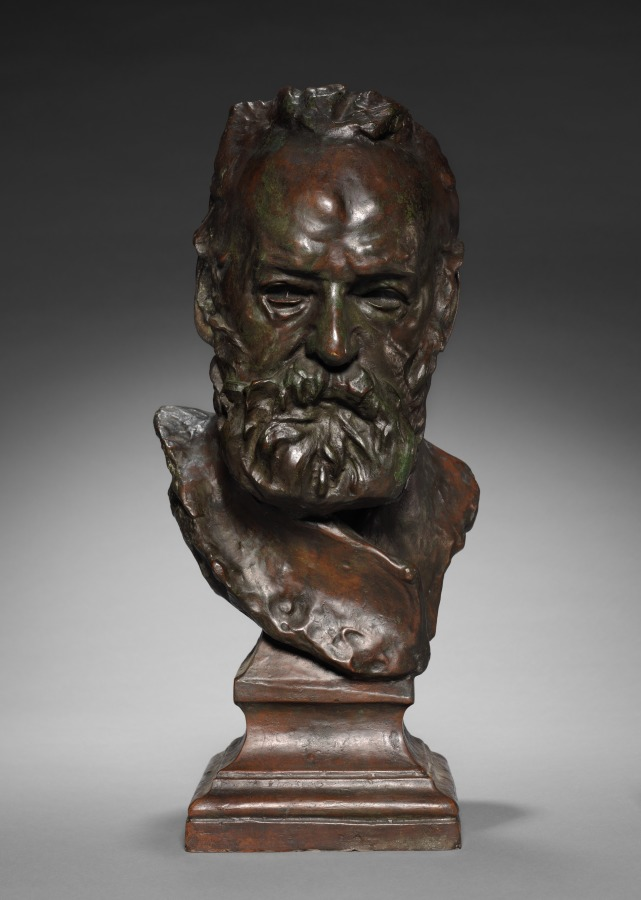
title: Bust of Victor Hugo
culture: France, 19th century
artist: Auguste Rodin (French, 1840–1917)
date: 1883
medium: bronze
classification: Sculpture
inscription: Signed beneath fold of drapery to left: "A. Rodin"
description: Unlike most of Rodin’s portraits, the bust of Victor Hugo (1802–1885) was made from memory because the famous French writer refused to sit for the artist. Among Hugo’s best-known novels are The Hunchback of Notre Dame (1831) and Les Misérables (1862).